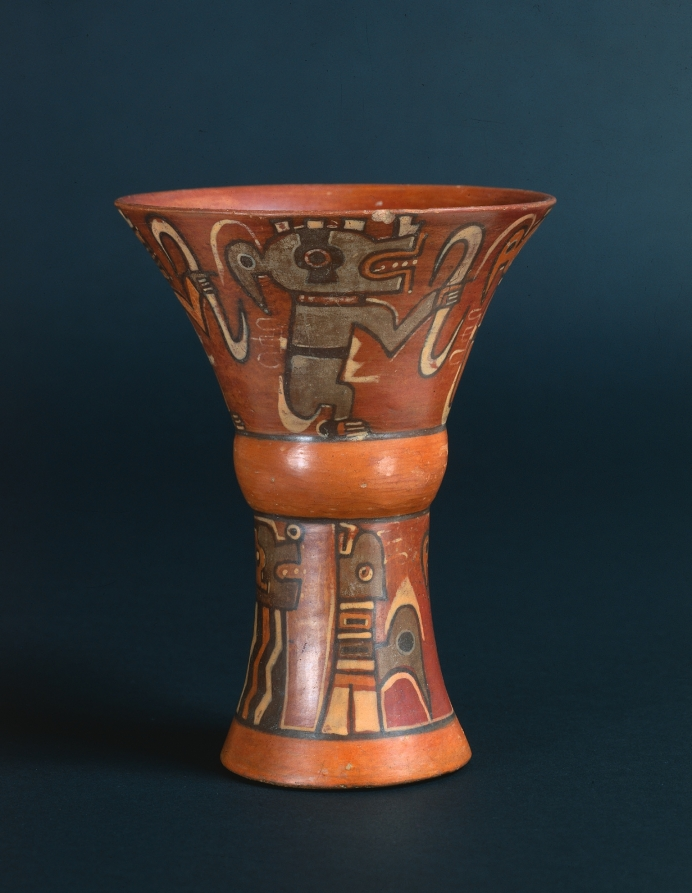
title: Kero (Waisted Cup)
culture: Bolivia, Cochabamba(?), Tiwanaku style, 400-1000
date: 400–1000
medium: earthenware with colored slips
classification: Ceramic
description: The kero is a distinctive Tiwanaku vessel form, imitated by the later Inka, who used the cups in political and religious ceremonies. It is assumed that the same was true at Tiwanaku, where impressive stone figures, perhaps rulers, hold keros as though they are emblems of authority. Perhaps, like the Inka, the Tiwanaku used keros to drink chicha, a corn beer shared to cement bonds of mutual obligation among allies.